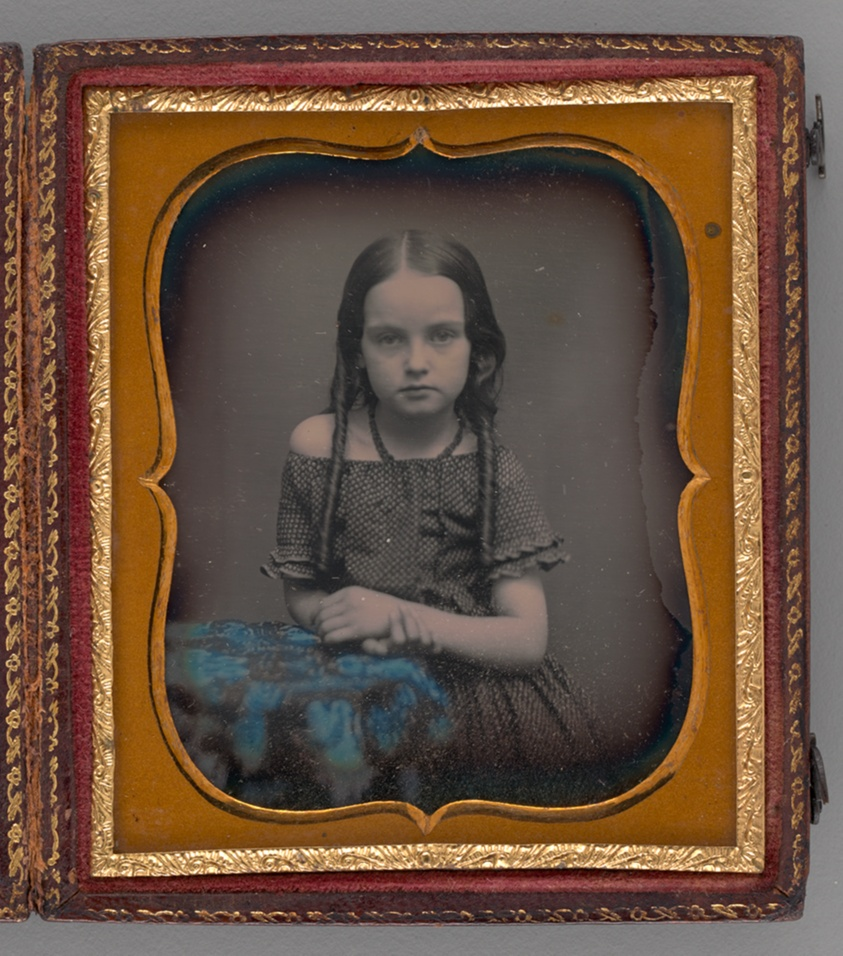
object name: Photograph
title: Untitled (Portrait of a Girl)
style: 19th century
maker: Unknown maker; American, 19th century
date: 1855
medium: Daguerreotype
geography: United States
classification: portrait; photograph; photographic process; photography; portrait; daguerreotype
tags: lundberg collection, portrait, female, portraits, portraits: child subject, portraits: female subject